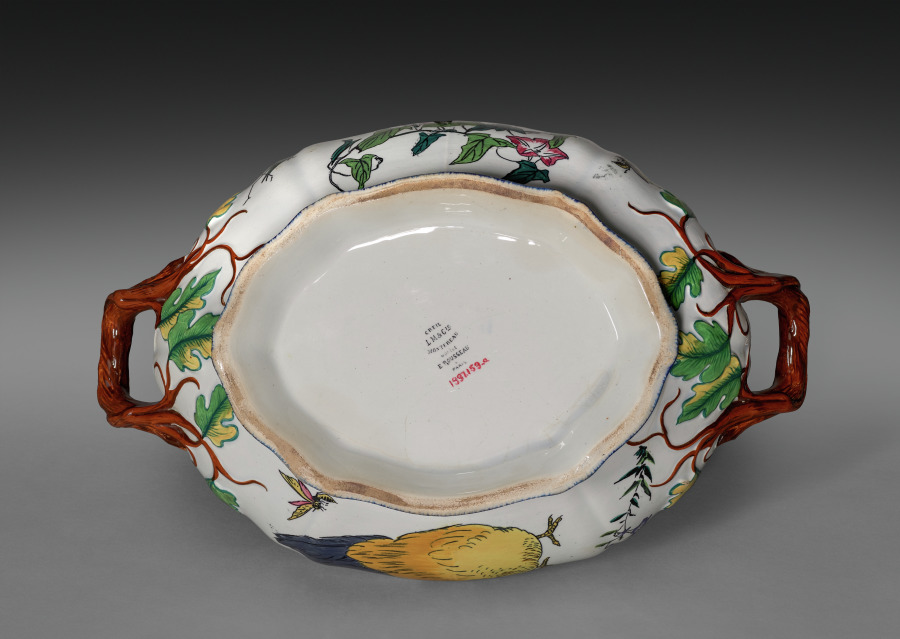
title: Tureen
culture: France, Creil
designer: Félix Bracquemond (French, 1833–1914)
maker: Creil Factory (French)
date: 1866–75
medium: porcelain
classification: Ceramic